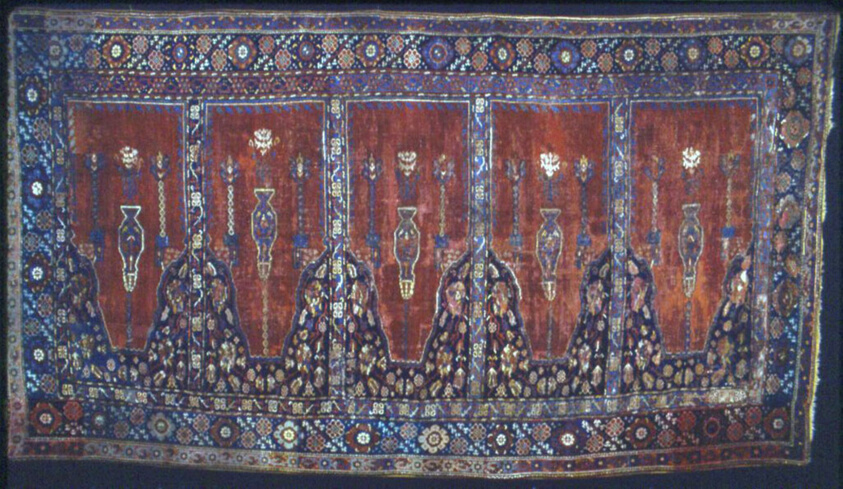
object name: Textile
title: Carpet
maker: Turkey, Anatolia, Ushak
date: 1775/1800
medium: Wool, plain weave (with variations) with supplementary wrapping wefts forming cut pile through a technique known as "Turkish" (Ghiordes) knots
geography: Turkey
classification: weaving - carpet; textile